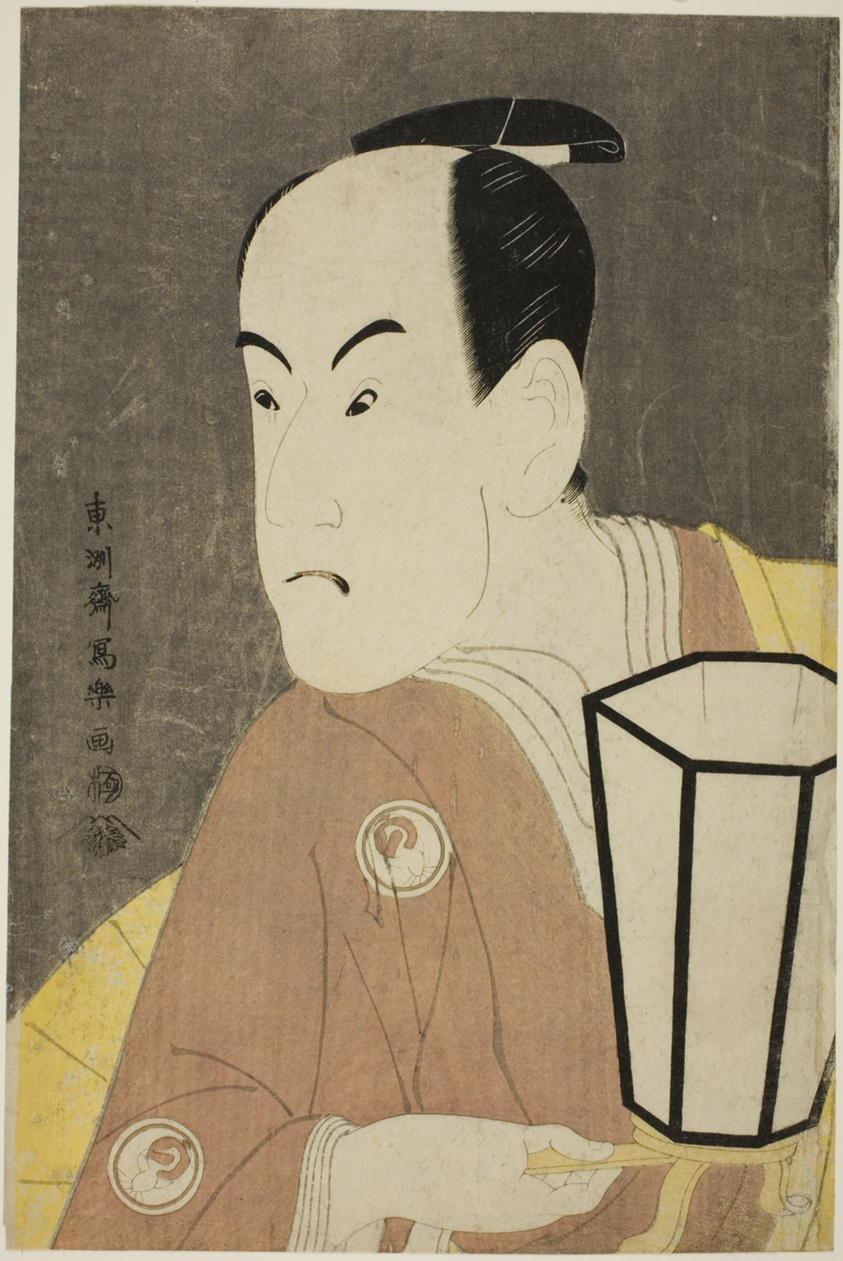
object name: Print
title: The actor Bando Hikosaburo III as Sagisaka Sanai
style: Japanese (culture or style)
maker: Toshusai Sharaku 東洲斎 写楽; Japanese, active 1794-95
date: 1794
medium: Color woodblock print; oban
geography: Japan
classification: woodblock print; print; asian art